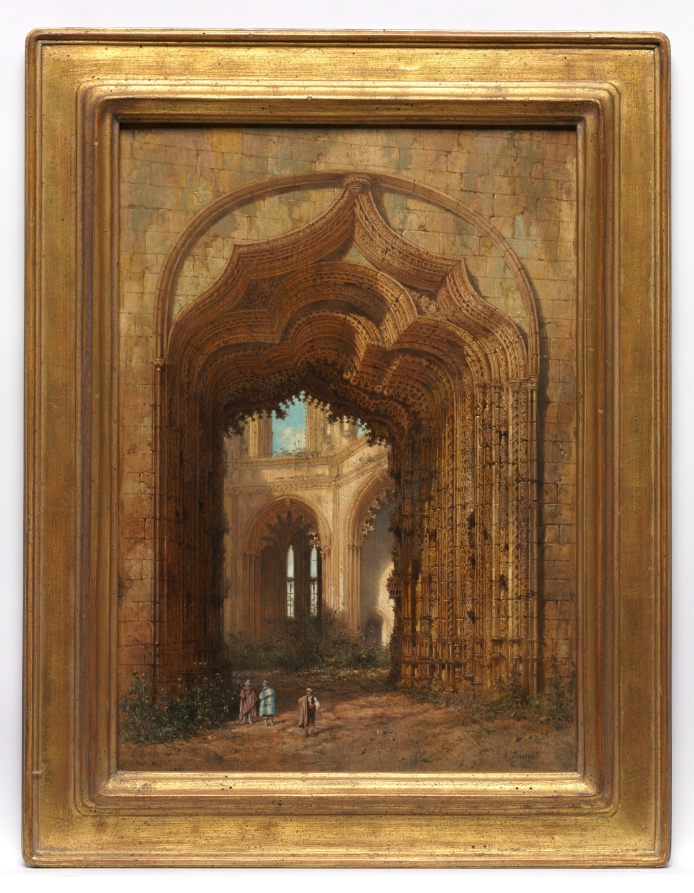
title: Ruined Church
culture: France, 19th century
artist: Adrien Dauzats (French, 1804–1868)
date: c. 1840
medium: oil on panel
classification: Painting